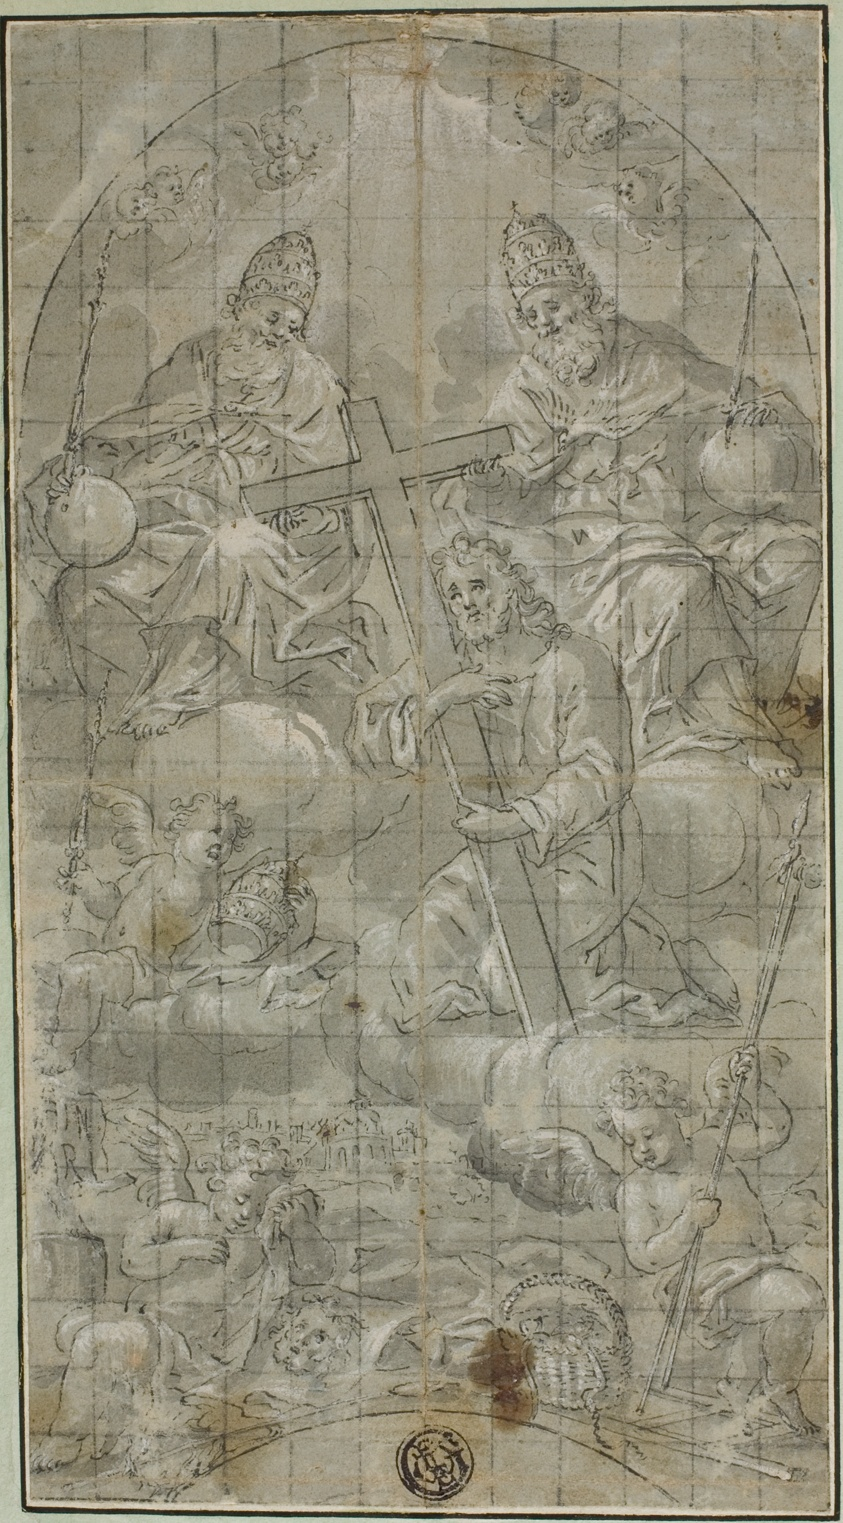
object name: Drawing and Watercolor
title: The Trinity with Christ Bearing the Cross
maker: Raffaello Vanni (Italian, 1596-1667)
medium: Pen and black ink with brush and gray wash, heightened with white gouache, squared in graphite, on gray tinted laid paper, laid down on board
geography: Italy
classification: pen and ink drawings; drawings (visual works); prints and drawing